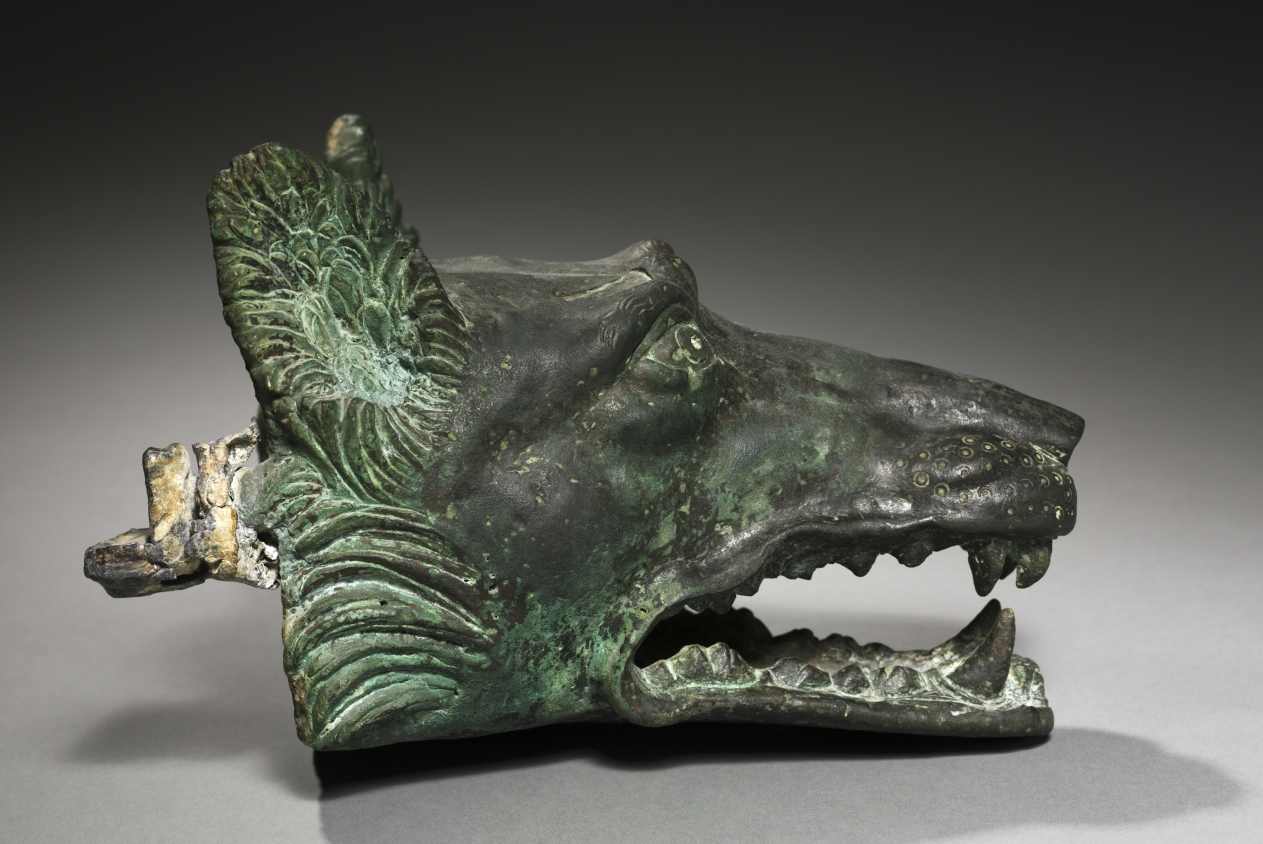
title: Wolf-Head Barge Fixture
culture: Italy, Rome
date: 1–100 CE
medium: bronze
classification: Sculpture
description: This snarling wolf head is closely similar to others that were attached to a luxurious pleasure barge moored on Lake Nemi, near Rome. The ship was designed as a floating platform for elaborate parties, and included impressive bronze fittings to ornament the wooden structure. Beam ends were capped with lion, panther, and wolf heads, each with a large bronze ring between its teeth.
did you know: The wolf is an important symbol of Rome, having reared its mythical founders, Romulus and Remus.